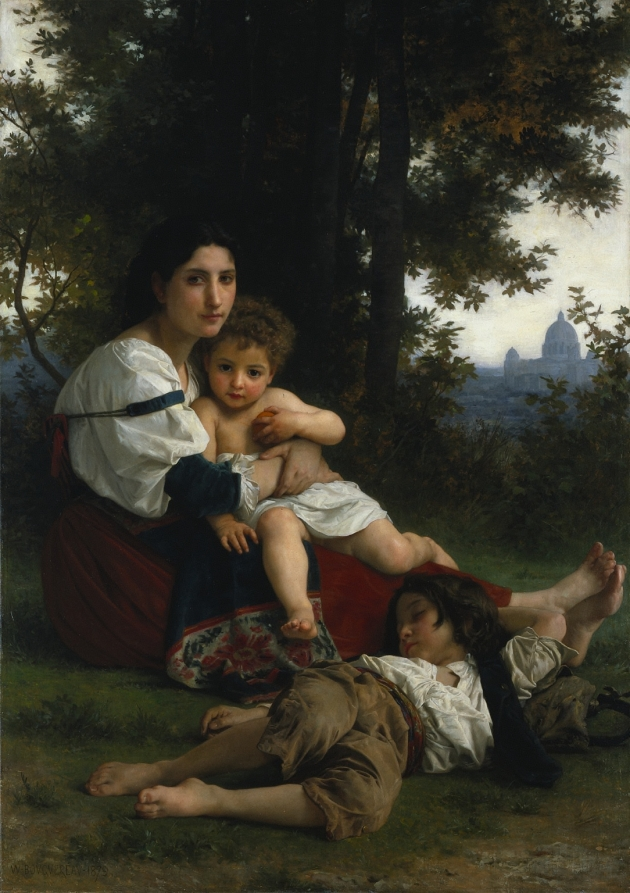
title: Rest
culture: France, 19th century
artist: William Adolphe Bouguereau (French, 1825–1905)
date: 1879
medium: oil on fabric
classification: Painting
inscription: Signed lower left: W. Bouguereau 1879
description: One of the most celebrated academic painters of his time, Bouguereau underscores the moral virtues of the Italian peasants in this painting by depicting the dome of St. Peter's in the distance. The idealized figures and their triangular grouping recall the Holy Family paintings by Renaissance master Raphael 400 years earlier. The painting was purchased directly from the artist by Cleveland banker and philanthropist Hinman B. Hurlbut in July 1879.